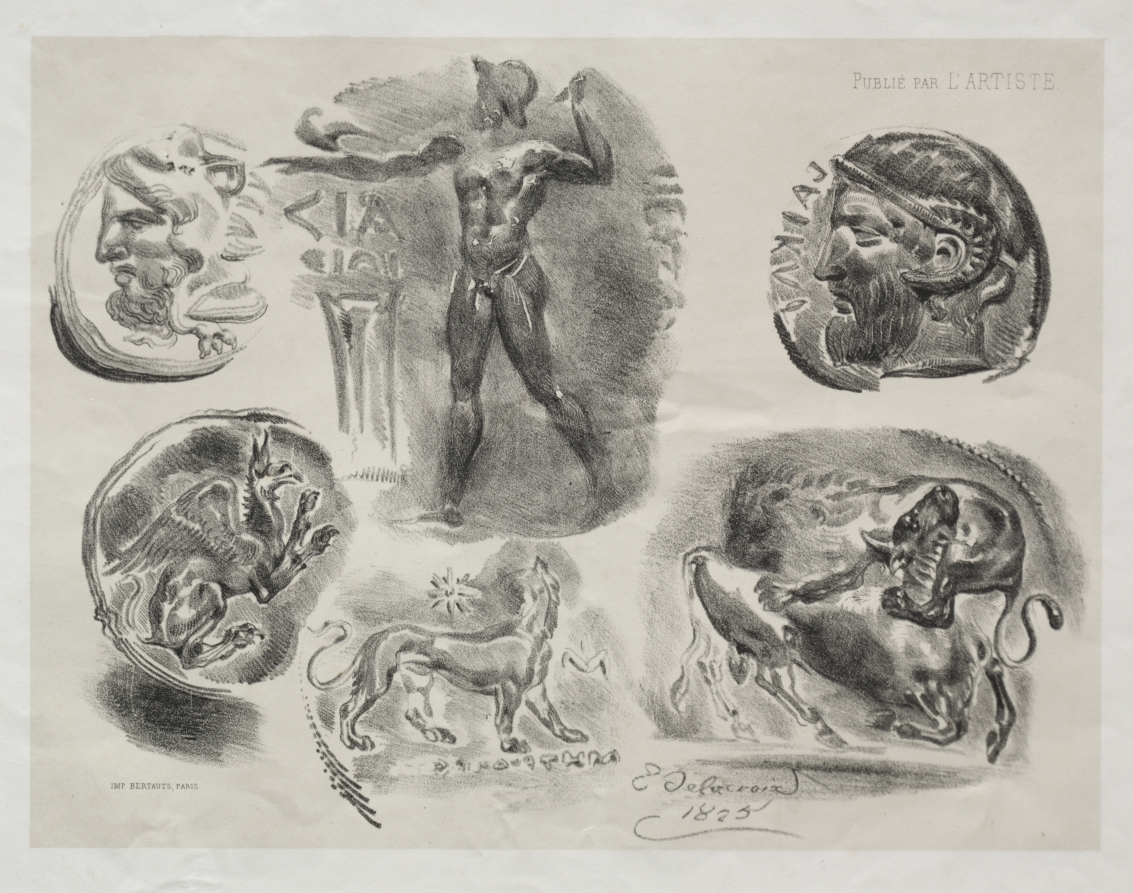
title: Sheet with Six Antique Medals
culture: France, 19th century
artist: Eugène Delacroix (French, 1798–1863)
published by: Bertauts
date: 1825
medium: lithograph with beige tint stone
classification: Print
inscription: signed and dated, lower center, in stone: E. Delacroix 1825; upper right, printed: Publié par l'Artiste; lower left, printed: Imp. Bertauts, Paris